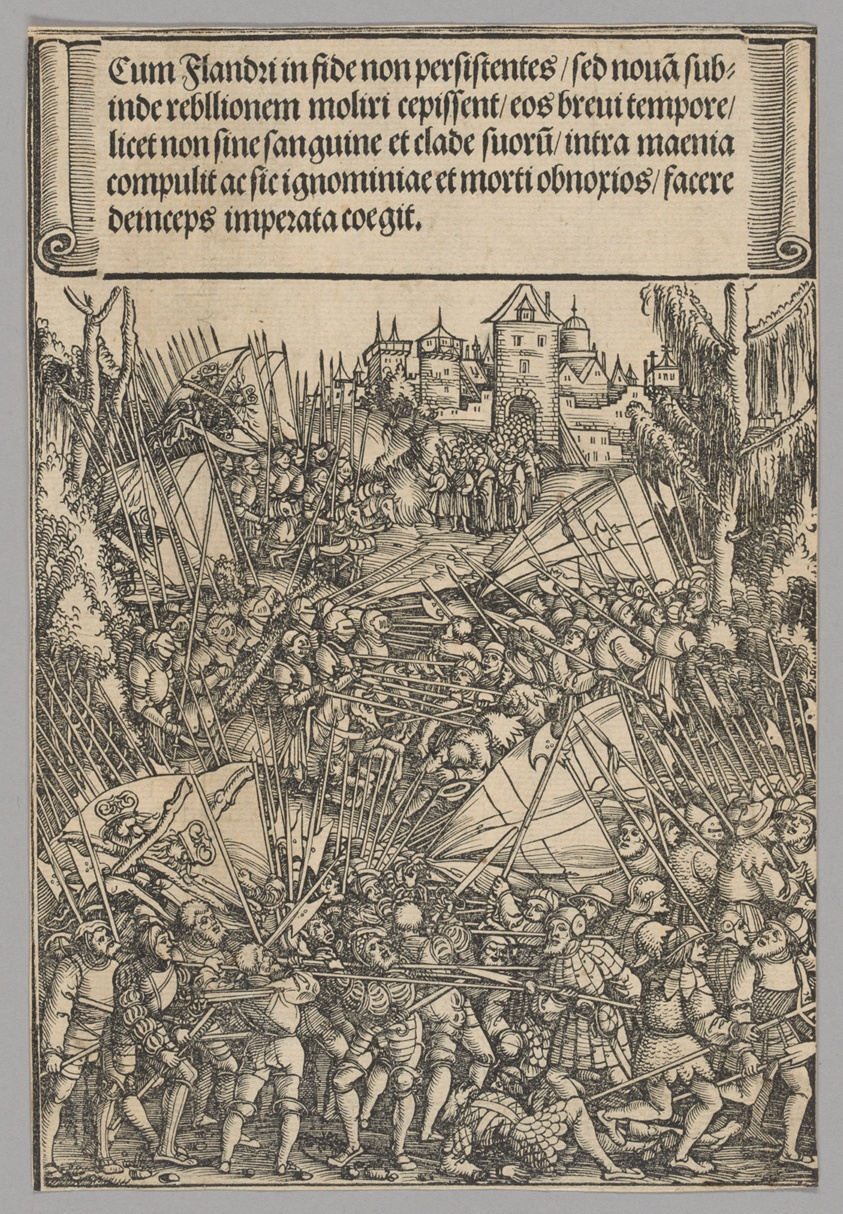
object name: Print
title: Second Flemish Rebellion, plate 10 from Historical Scenes from the Life of Emperor Maximilian I from the Triumphal Arch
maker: Hans Springinklee (German, c. 1495-after 1522); printed by Hieronymus Andreae (German, died 1556)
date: 1515-17, printed c. 1520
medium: Woodcut in black ink on cream laid paper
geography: Germany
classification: print; paper; woodcut; prints and drawing